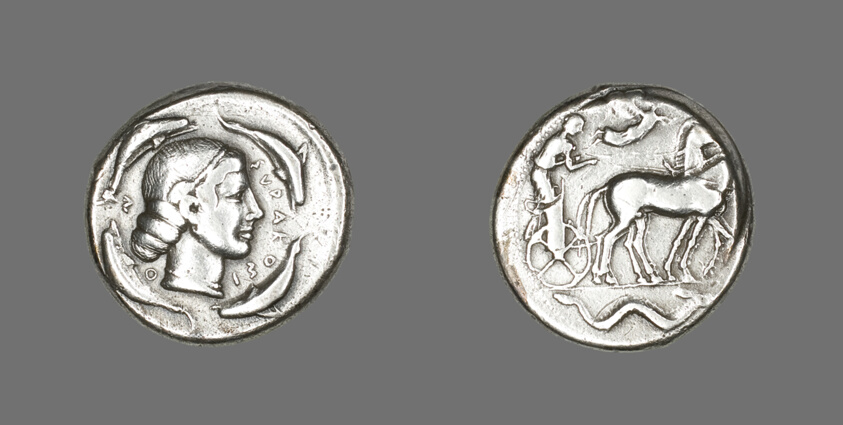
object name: Coin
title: Tetradrachm (Coin) Depicting Arethusa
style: Classical, archaic (greek)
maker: Greek, minted in Syracuse, Sicily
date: 474-450 BCE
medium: Silver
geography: Ancient Greece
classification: coin; ancient art